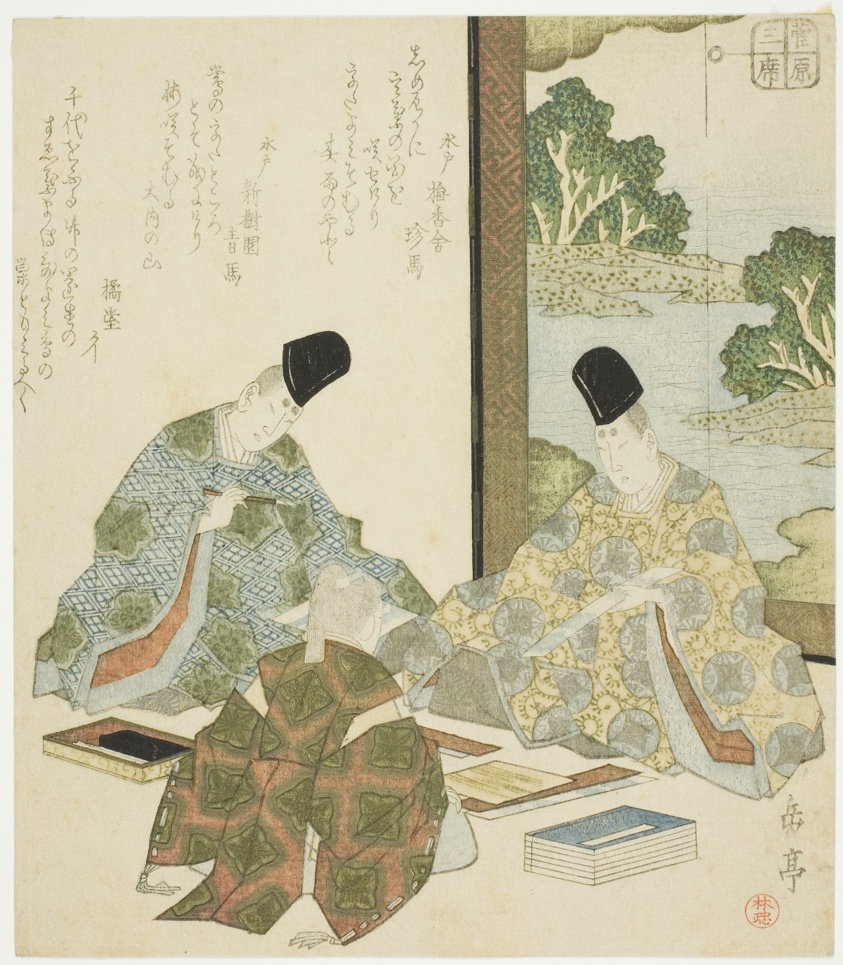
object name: Print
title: Japanese poetry, from the series "Three Classical Arts for the Sugawara Circle (Sugawara sanseki)"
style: Japanese (culture or style)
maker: Yashima Gakutei (Japanese, 1786 (?)-1868)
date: early 1820s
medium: Color woodblock print; shikishiban, surimono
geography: Japan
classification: woodblock print; print; asian art